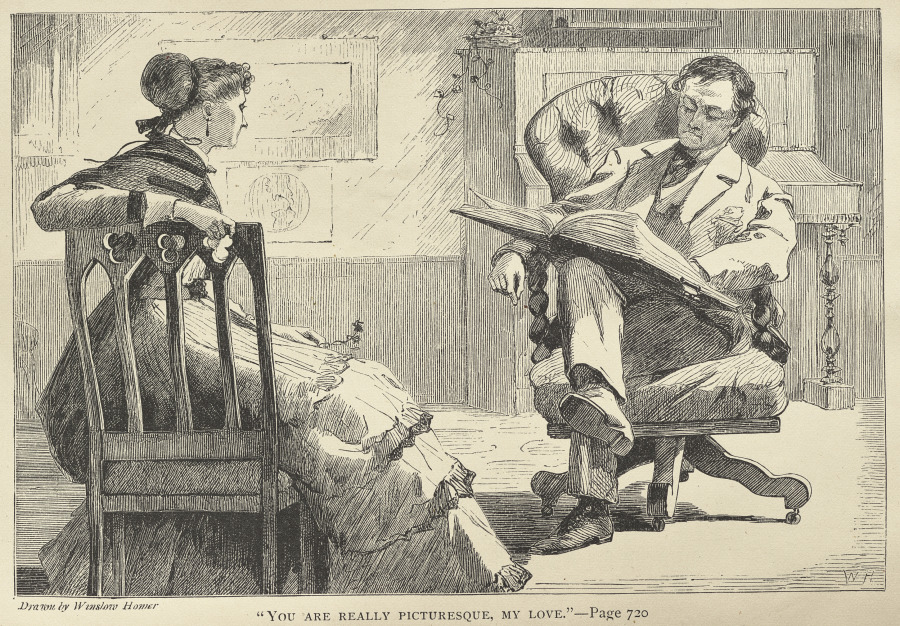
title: "You Are Really Picturesque, My Love"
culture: America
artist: Winslow Homer (American, 1836–1910)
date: 1868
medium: wood engraving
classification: Print